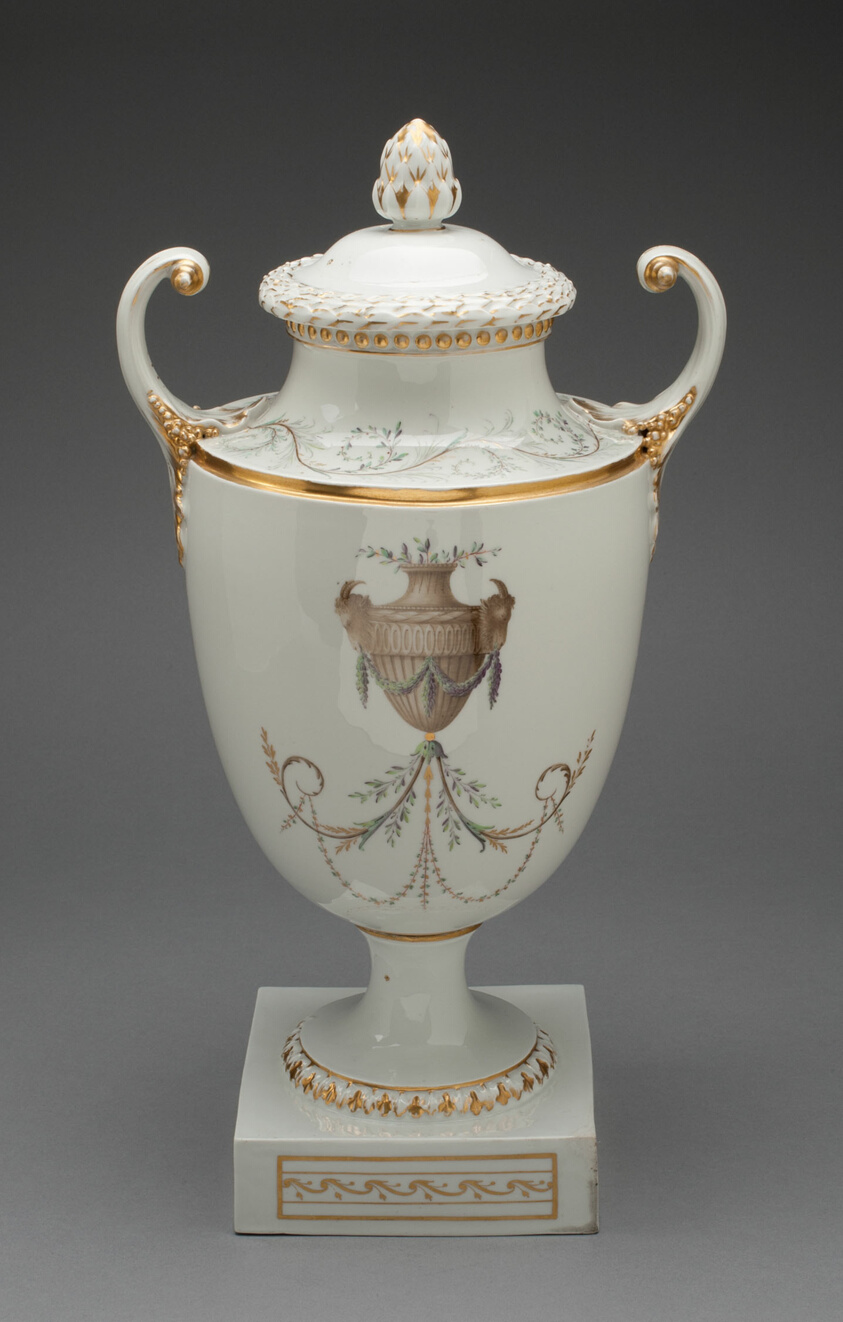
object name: Ceramics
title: Vase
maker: Fürstenberg Porcelain Factory (German, founded 1747)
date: c. 1800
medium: Hard-paste porcelain, polychrome enamels, and gilding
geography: Fürstenberg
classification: vase; porcelain; vessel; european decorative arts; ceramics